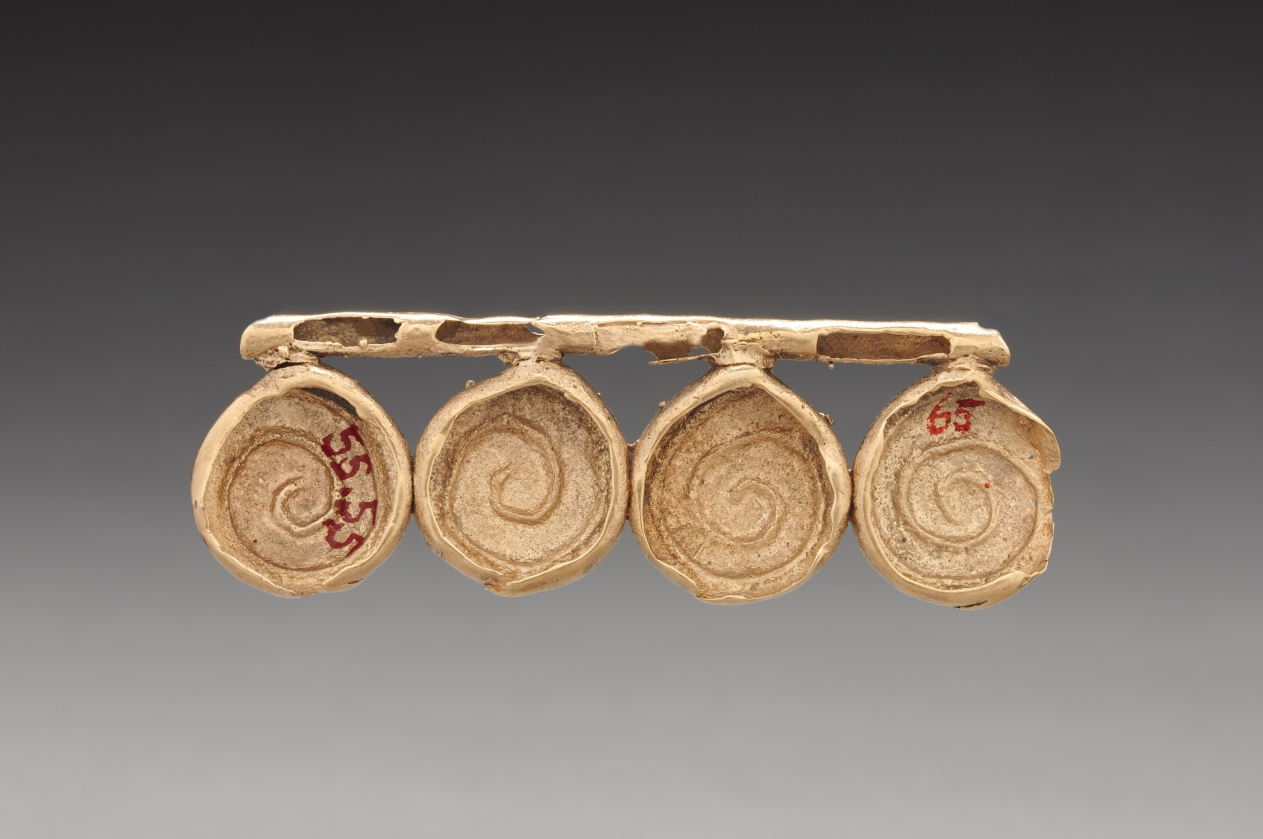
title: Linked Shells Pendant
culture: Colombia, Muisca style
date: c. 900–1550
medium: cast gold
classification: Metalwork